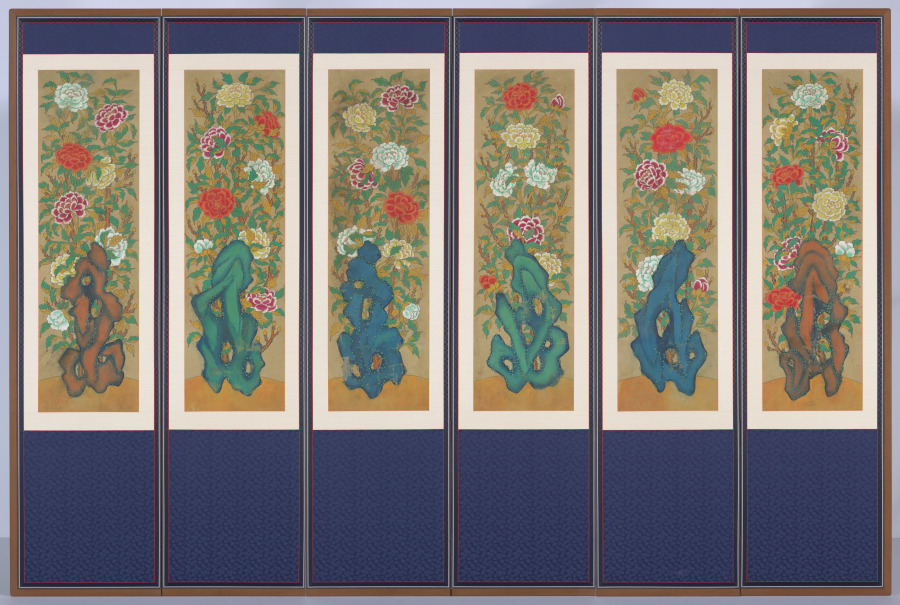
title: Peonies and Rocks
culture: Korea, Joseon dynasty (1392−1910) or Japanese colonial period (1910−1945)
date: early 1900s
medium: Six-panel folding screen; ink and color on silk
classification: Painting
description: By the late nineteenth century, peony paintings with bold designs and striking graphic stylization were increasingly produced and consumed by middle-class members because of its symbolic meaning: prosperity and wealth.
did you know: In East Asian art, peonies traditionally symbolize prosperity and wealth.